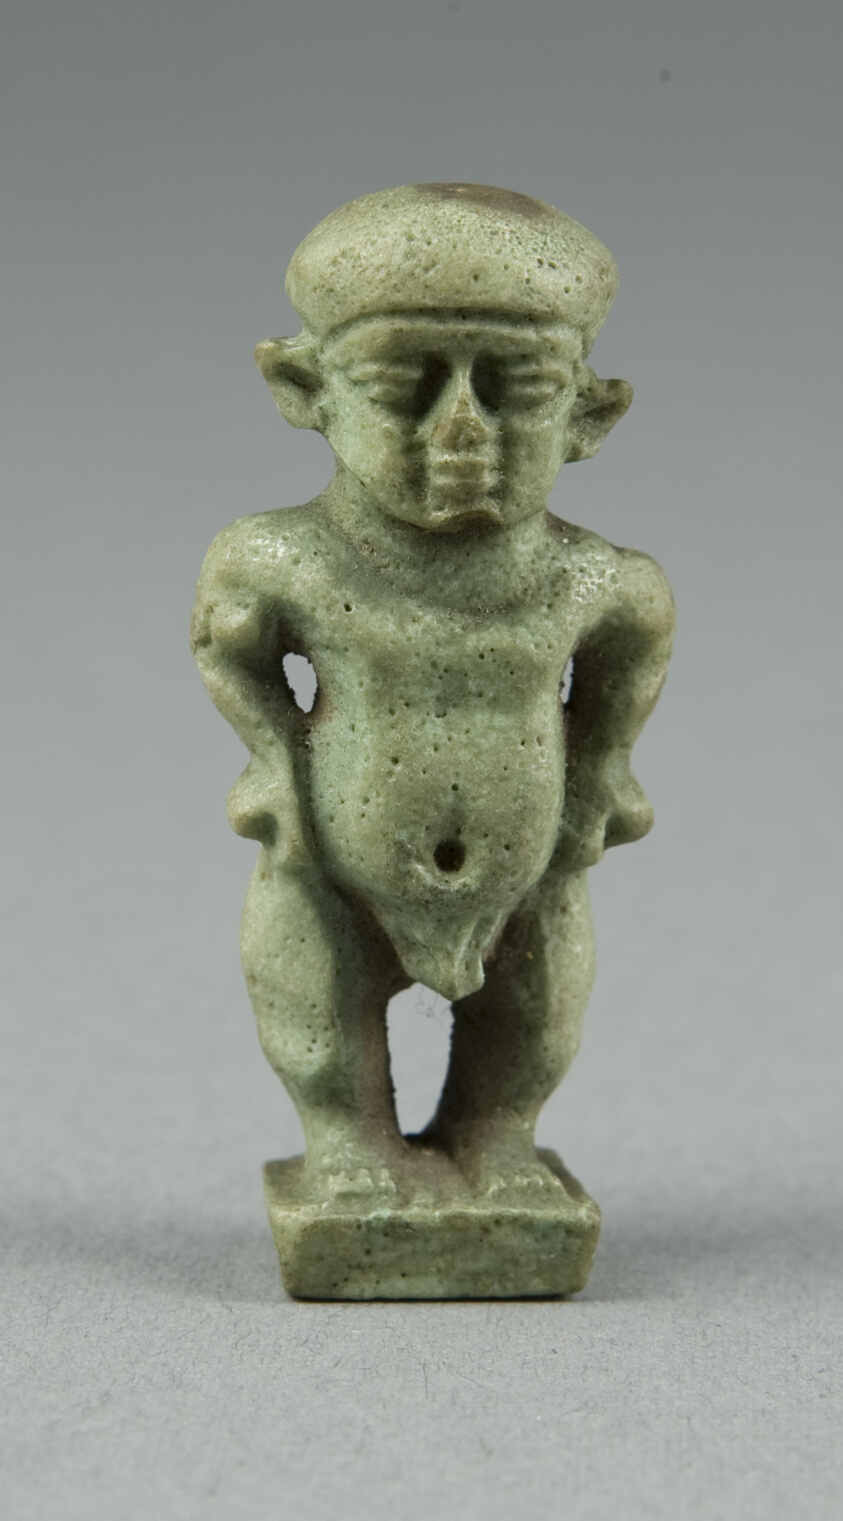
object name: Costume and Accessories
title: Amulet of Pataikos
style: egyptian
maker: Egyptian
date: Third Intermediate Period–Late Period, Dynasty 21–31 (about 1069–332 BCE)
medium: Faience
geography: Egypt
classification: amulet; jewelry; ceramics; ancient art; costume; faïence (composite material)